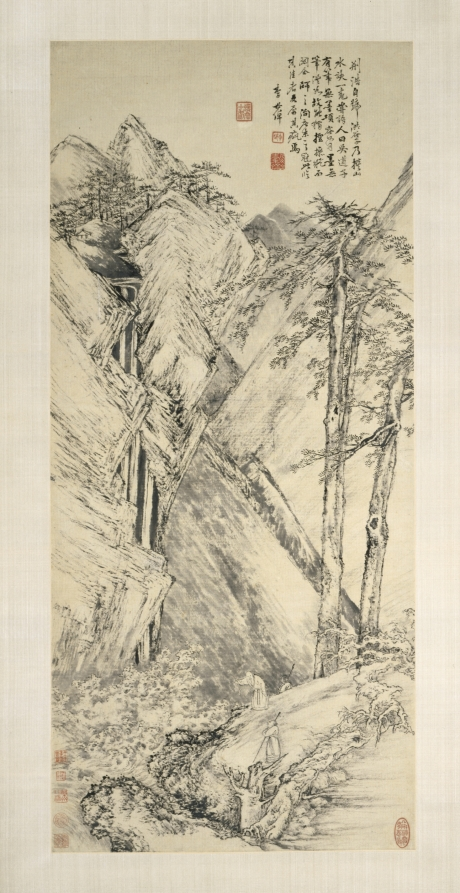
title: Landscape after Jing Hao and Guan Tong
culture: China, Qing dynasty (1644-1911)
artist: Li Shizhuo (Chinese, c. 1690–1770)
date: c. 1690–1770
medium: hanging scroll; ink on paper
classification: Painting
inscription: 荆浩自號洪谷子，乃撰山水訣一卷。嘗誇人曰：吳道子有筆無墨，項容有墨無筆。洪谷故能獨擅操縱，而關仝師之。絢唐末之冠。此臨其佳者而更屛其疵焉。李世倬 [印]卓氏; 穀齋; 蝯詹上_ [印, 右下]几研精嚴見性情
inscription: 5 additional seals: 1 of C. C. Wang 王季遷 (1907–2003); 4 unidentified.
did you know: Three figures on the lower slope excitedly watch the waves and foam rising beneath the waterfall.